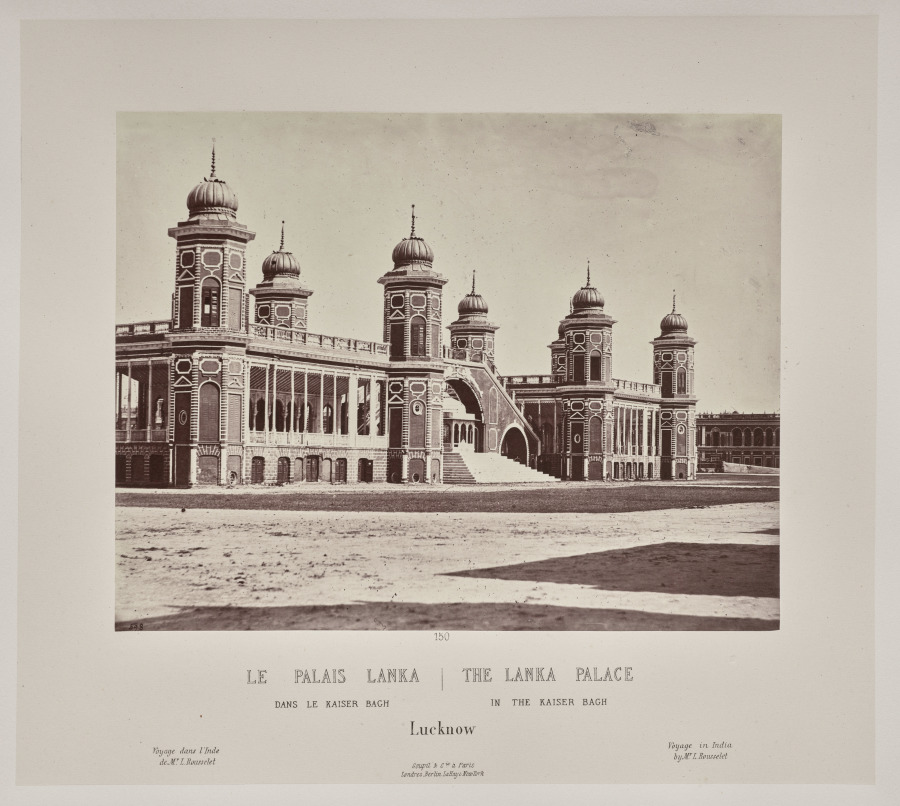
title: The Lanka Palace in the Kaiser Bach, Lucknow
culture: France, 19th century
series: India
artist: Louis-Théophile Marie Rousselet (French, 1845–1929)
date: 1865–68, published 1869–70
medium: Albumen print from glass plate negative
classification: Photograph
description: Concerned that his drawings did not do justice to the splendor of India’s monuments, Rousselet learned photography in India that year, a remarkable accomplishment. He proved to be a talented photographer with a sophisticated sense of composition. The scenes in this volume sweep across sites of Sultanate, Rajput, and Mughal power in northern India, from the sacred Hindu city of Varanasi on the Ganges River to Alwar in Rajasthan. Also included are several scenes of industry and portraits of Indian rulers.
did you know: Louis Rousselet described himself as a “scientific traveler” when he went to India alone at age 18 in 1863 and stayed into 1868.